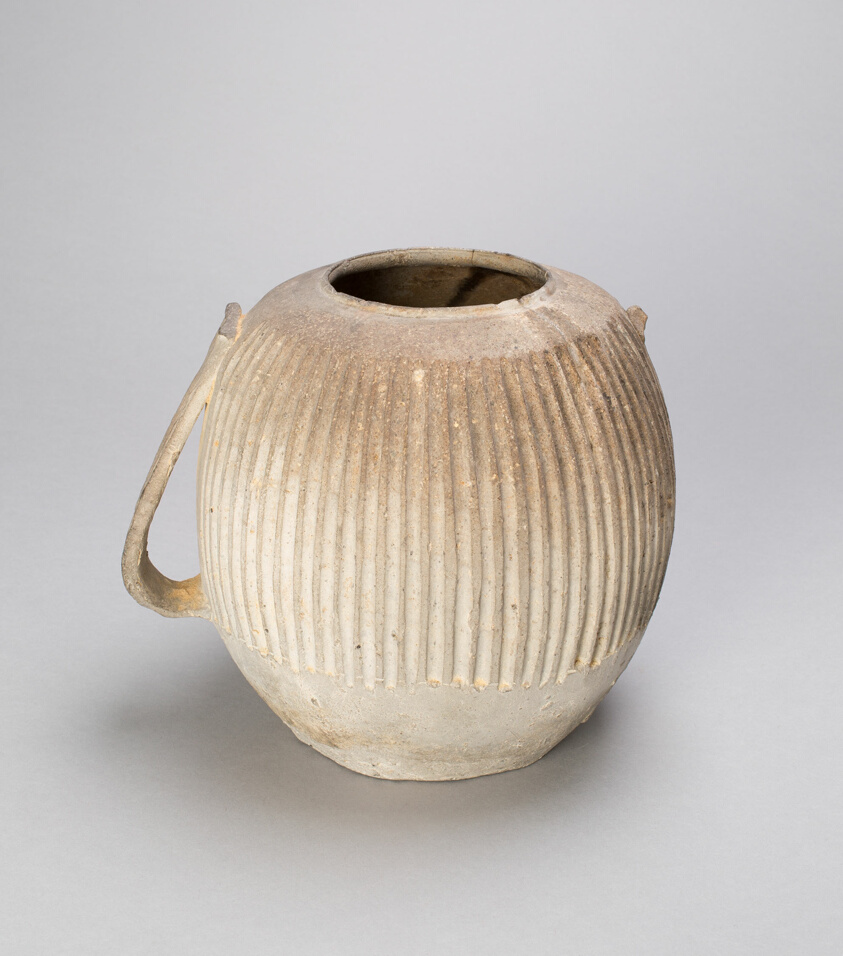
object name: Vessel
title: Ovoid Jar with Handle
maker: China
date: Warring States period (480–221 B.C.), c. 4th century B.C.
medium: Stoneware with traces of ash glaze with carved decoration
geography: China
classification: earthenware; asian art; ceramics; vessel